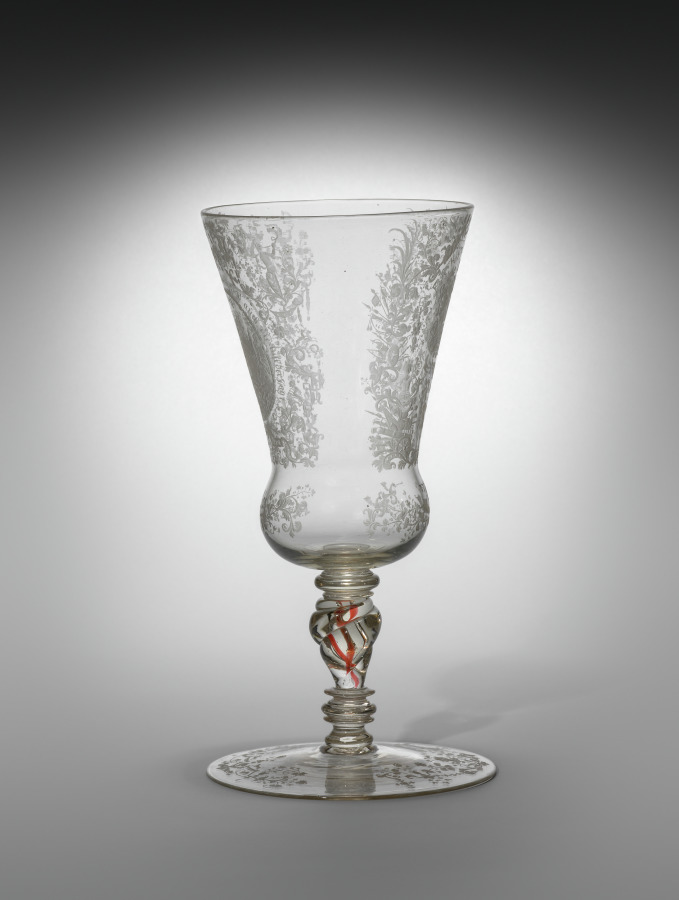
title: Standing Cup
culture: Bohemia, 18th century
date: c. 1715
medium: glass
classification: Glass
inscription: the German inscription engraved around the hunting scene translates as: When sorrow torments us enjoy a glass of wine and also the joy of a hunt; engraved on the opposite side: F.A.K.J.P.V.C.F.Z.S. (Friedrich August Keonig in Polen und Chur Fuerst zu Sachsen).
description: Engraved with arms of Saxony-Poland and Hunting Scene.